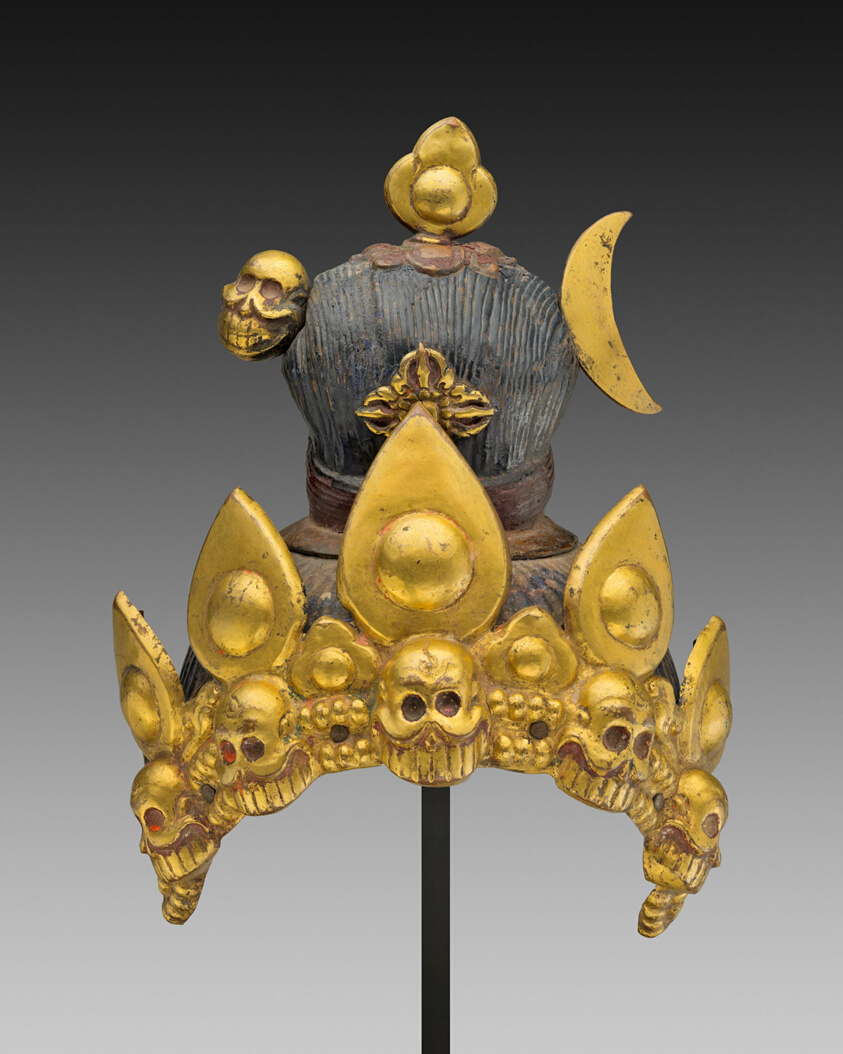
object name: Costume and Accessories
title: Tantric Buddhist Priest’s Crown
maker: Kathmandu Valley, Nepal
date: Late 18th century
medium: Gilt copper and copper with pigments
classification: costume